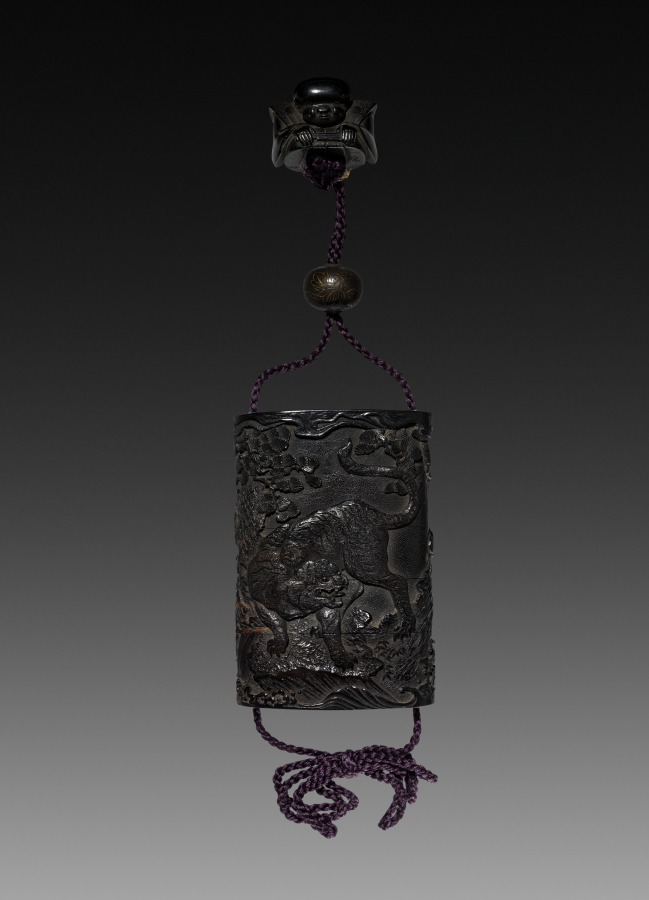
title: Inro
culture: Japan, Edo period (1615–1868)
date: 1615–1868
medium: lacquer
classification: Lacquer